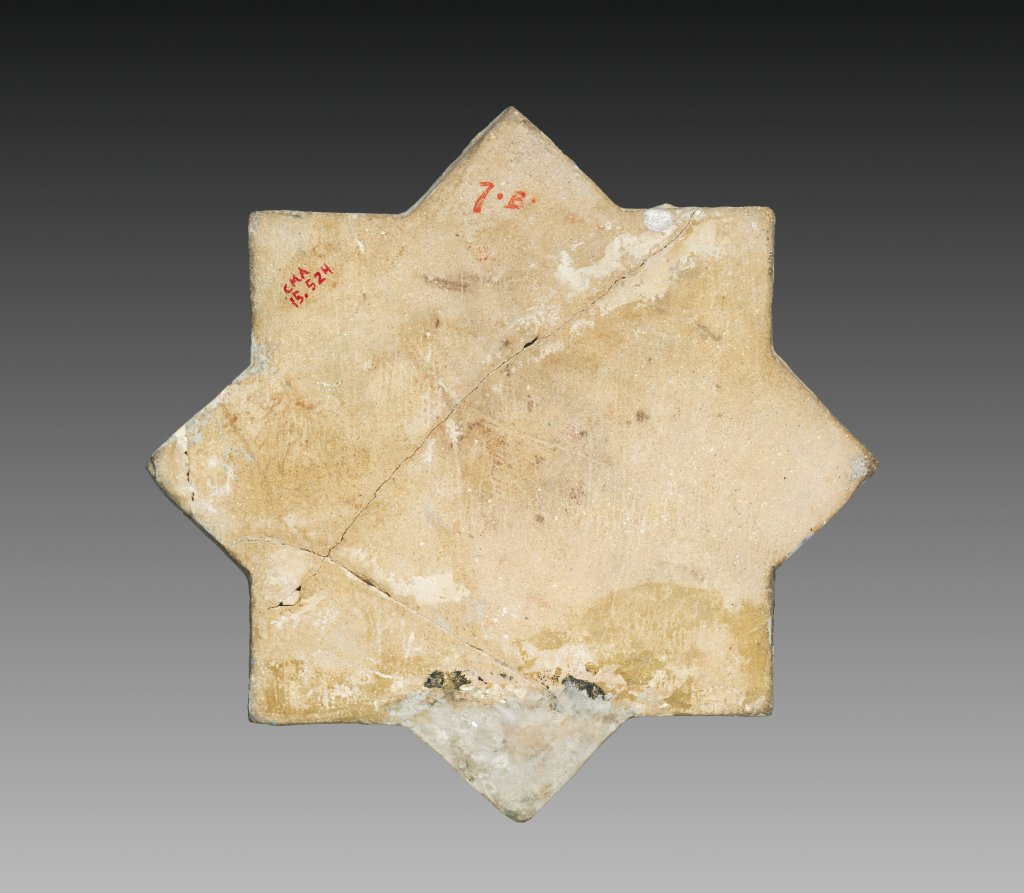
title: Luster Wall Tile with a Couple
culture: Iran, Kashan, Ilkhanid period (1256-1353)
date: 1266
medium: fritware with luster-painted design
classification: Ceramic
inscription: Top reading R to L: (1) Rubāʿī: TEXT: zulfat ki hizār zangī afzūn dārad——————bar turk-i khitā ʿazm-i shabīkhūn dārad v'ān zangī laʿl duzd-i mutvāri-rā——————āvikht-i dār ki basi khūn dārad. TRANSLATION: Your tresses, which possess over a thousand Zangis (Zanjis, black slave-soldiers, i.e. more than a thousand strands of hair) Are bent on a surprise night time charge against the Cathay Turks (handsome slave-soldier boys redolent of musk) And (as for) that ruby stealing (disheveled) Zangi in hiding Have him hanged for he has plenty of blood on his hands. (2) Rubāʿī: these verses start immediately after the last verses, on the left hand side going down: TEXT: zulfat ki chu afʿī pay-i sharr mi-gardad———dāni pas-i pushtat bi-chi bar migardad chun dīd ki laʿl to [zumurrud bigrift————vahshī shud u bar kuh u kamar migardad.] TRANSLATION: Your hair (tresses), which viper-like is bent on mischief, do you know why it returns behind your back? When it saw that your ruby (lips) has (now) an emerald (down appearing above the lips), it became wild (lost all senses) and wanders on the mountain side.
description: The design of this tile-a couple with a wine beaker surrounded by verses of Iranian love poetry-indicates that it was originally part of wall decoration and would have alternated with cross-shaped tiles.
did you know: Where fine clay was unavailable, potters made a paste out of ground quartz, clay, and glass. When fired, the paste created a compact white material called fritware that approximated the appearance of porcelain.